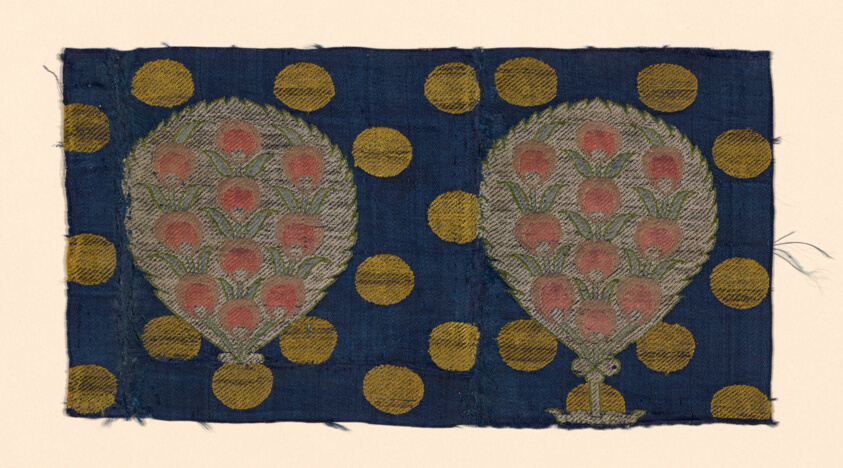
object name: Textile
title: Fragment (Dress Fabric)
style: isfahan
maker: Iran (Persia, Isfahan)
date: 18th century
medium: Brocaded plain simple satin, silk, gold wound on yellow silk core and silver wound on white silk core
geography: Iran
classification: textile; weaving